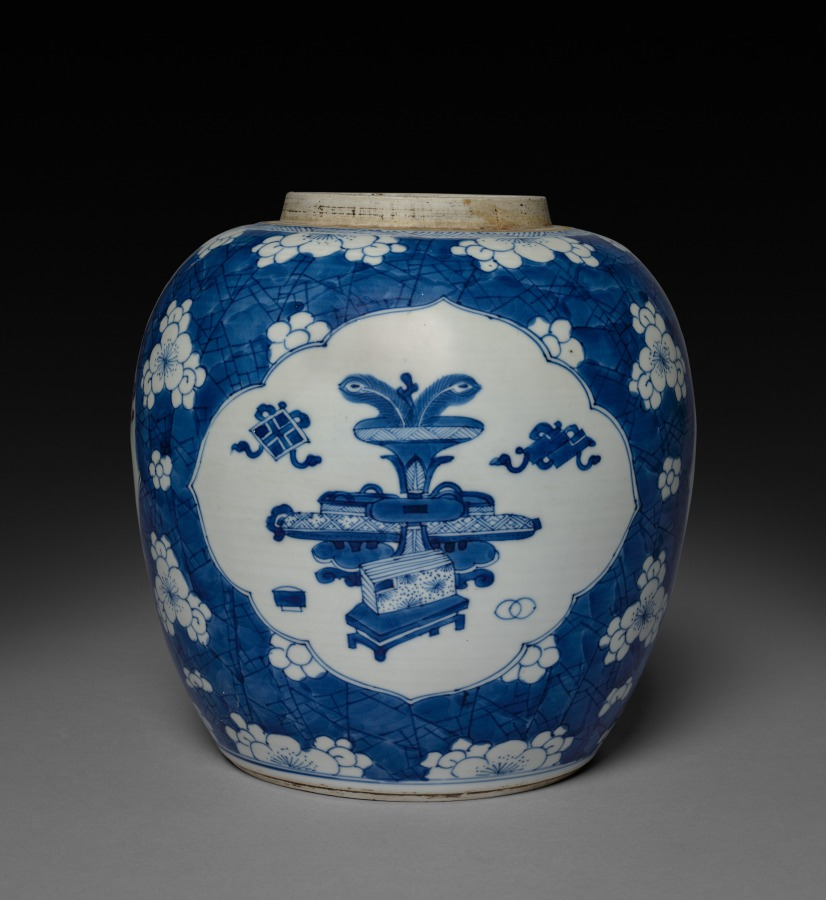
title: Ginger Jar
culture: China, Qing dynasty (1644-1911), Kangxi reign (1662-1722)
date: 1662–1722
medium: porcelain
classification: Ceramic